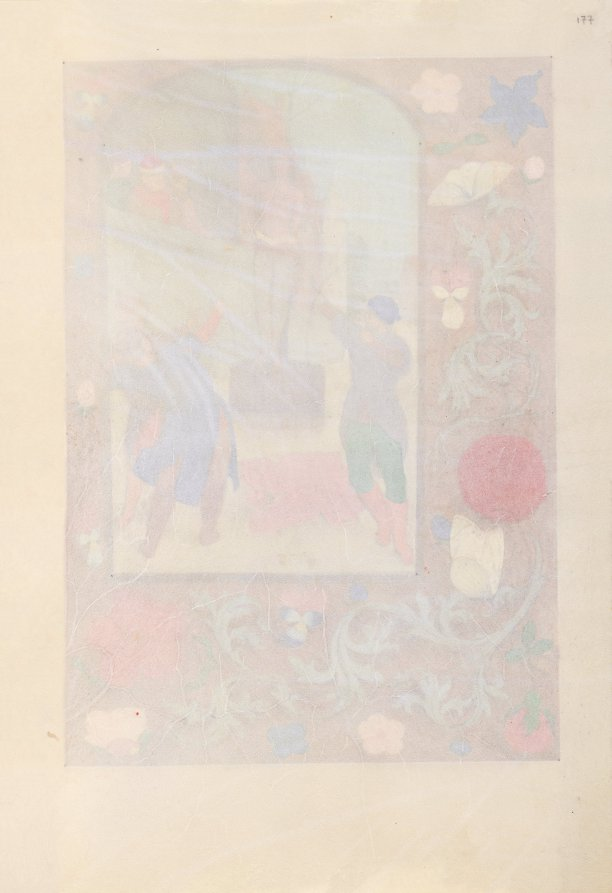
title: Hours of Queen Isabella the Catholic, Queen of Spain: Fol. 177r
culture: Flanders, Ghent and Bruges, late 15th century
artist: Master of the First Prayerbook of Maximillian (Flemish, c. 1444–1519)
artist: and Associates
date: c. 1500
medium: ink, tempera, and gold on vellum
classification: Bound Volume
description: This manuscript was illuminated by a circle of at least five highly organized manuscript painters active in the Flemish cities of Ghent and Bruges. The principal illuminator was Alexander Bening, who painted the majority of the book's miniatures. Manuscripts produced by this circle of artists are renowned for the decoration of their borders, which typically feature a rich variety of realistically-painted flowers, birds, and butterflies. This prayer book, called a book of hours, was intended not for a cleric, but for the private devotions of a lay person-in this case, Isabella the Catholic, Queen of Spain (1451-1504). Isabella's coat of arms embellishes the book's frontispiece. It is unlikely that the book was commissioned by the Queen herself; rather, she probably received it as a diplomatic gift from someone courting her patronage, perhaps Cardinal Francisco Jimenez de Cisneros. A Franciscan friar, Jimenez was dependent upon Isabella for his advancement, first to the post of Queen's confessor in 1492, and then to Archbishop of Toledo in 1495.